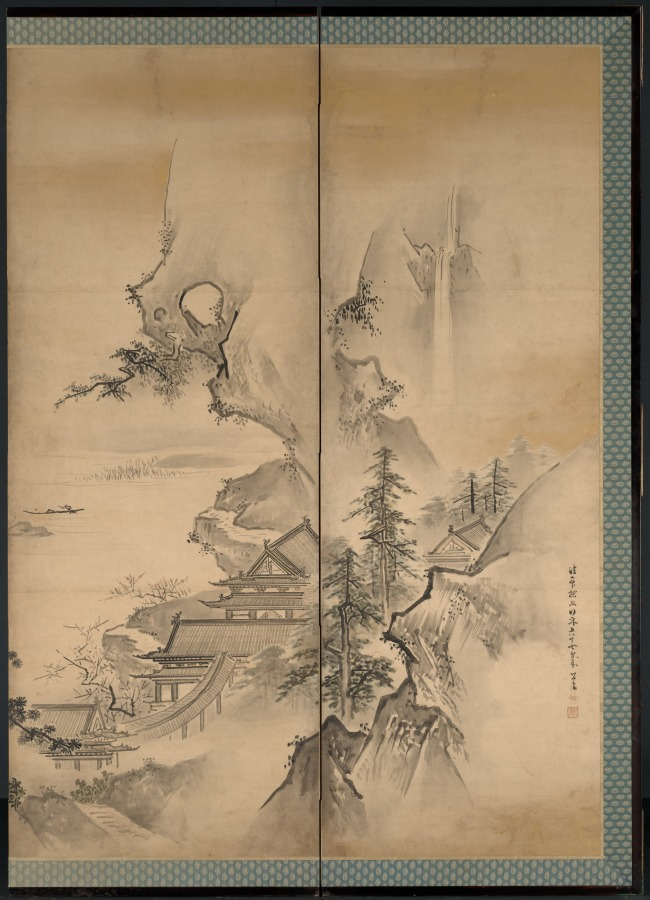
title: The Four Seasons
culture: Japan, Edo period (1615–1868)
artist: Kano Tan’yū (Japanese, 1602–1674)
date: 1668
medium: Six-panel folding screen, ink and slight color on paper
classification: Painting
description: Tan'yū's skills were honed early within the regimen of the Kano family's painting studio. His grandfather, Eitoku (1543–1590) was the Momoyama period's most sought-after painter, a champion of colorful, large-scale painting compositions who worked for several of the country's most powerful leaders. When the young Tan'yū was summoned to Edo in 1617 by the shogun to become a member of the new capital's official painting studio, few opportunities to work on similarly ambitious projects existed. Yet by the end of his career, Tan'yū had supervised the execution and installation of linked mural painting compositions in several of Japan's most prestigious residences and castles. As an official court painter to the first shogun, Tokugawa Ieyasu (reigned 1603–5), and then his successors, Tan'yū appears to have successfully juggled his official duties with private activities as a teacher, as the era's leading connoisseur of classic Chinese and Japanese painting, and as a practicing artist. His surviving compositions as well as thousands of sketches far surpass the oeuvre of any of his contemporaries. While studio assistants surely contributed to his oeuvre, just as later imitators consciously confused his accomplishments, a clearer image of the painter has emerged in recent years that better conforms with his contemporary acclaim as recorded in seventeenth- and eighteenth-century documents. Tan'yū can now be seen as an artist adept in virtually all traditional ink painting subject matter, which he often presented in novel interpretations. Equally important are his rare screen (byōbu) compositions executed in a pure yamato-e manner with vivid mineral pigments on a gold-foil background. This pair of byōbu presents Tan'yū's more orthodox approach to academic ink painting methods embracing Chinese themes that had been interpreted by numerous Japanese ink painters over the centuries. Thus a typical view of residences and human activities set along the shores of an impressive river (or lake) is enlivened by the Japanese proclivity for including seasonal references. Proceeding from right to left, the viewer passes sequentially from spring to the snow-laden branches of winter. Tan'yū lends considerable atmospherics to the panorama in his use of misty cloud banks, frequently set off by sharp, darkened ink lines or whole areas of ink washes of variegated tonalities. The spring and summer views are particularly notable in this regard, as is the presence of the artist's signature on both byōbu, attesting to their completion in Tan'yū's sixty-seventh year (1668)—50 years after he left Kyoto for the capital, and 30 years following his adoption of the artist name "Tan'yū" (in 1635). From 1622, when he began work on the mural paintings for Edo castle (the shogun's formal residence), through the completion of the painting cycle in 1636 for the Tokugawa family mausoleum in Nikkō to the north of Edo, Tan'yū's skills as head of an accomplished painting studio as well as a master painter found their most impressive expression in large-scale compositions. In 1638 he received the honorary Buddhist title Hōgen (Eye of the Law). It is intriguing therefore that relatively few independent byōbu paintings from the master's hand survive, particularly documented early works.